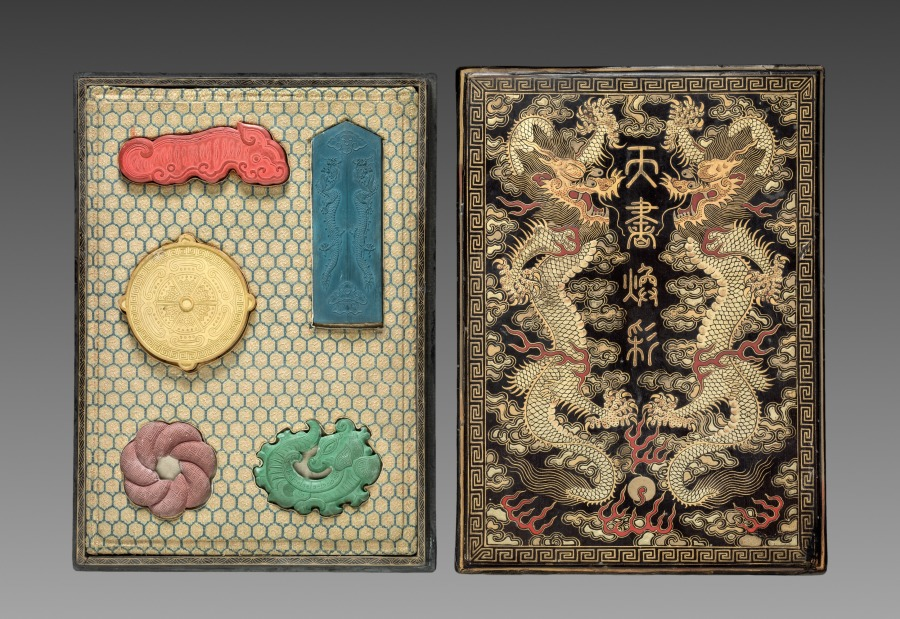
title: Box with Ink Cakes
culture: China, Qing dynasty (1644-1911), Jiaqing reign (1795-1820)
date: 1795–1820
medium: Lacquer and silk box; molded ink in red, yellow, blue, and green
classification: Lacquer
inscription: 江西巡撫臣陳淮恭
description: Ink cakes (also called ink sticks) are dissolved with the addition of water and then ground on the surface of a flat square stone into liquid ink for painting and calligraphy. The precious ink cakes here, however, have never been used. The inscription on the side of the blue Gui scepter-shaped ink cake says that the set was commissioned by Chen Huai, Governor of Jiangxi province. The green and bright red ink cakes take the forms of archaic dragons. The dull red ink cake resembles a brocade knot. The yellow cake shaped like the Buddhist "Wheel of the Law" is inscribed on the reverse.